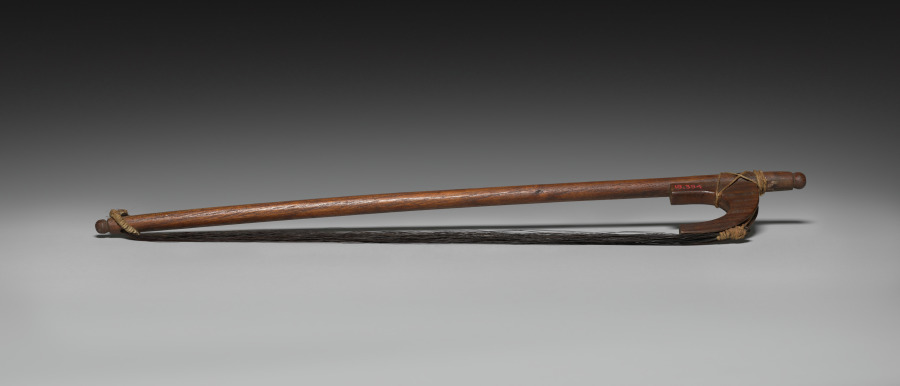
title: Bow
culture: India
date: 1800s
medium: Wood, horsehair, and jute fiber cord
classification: Musical Instrument